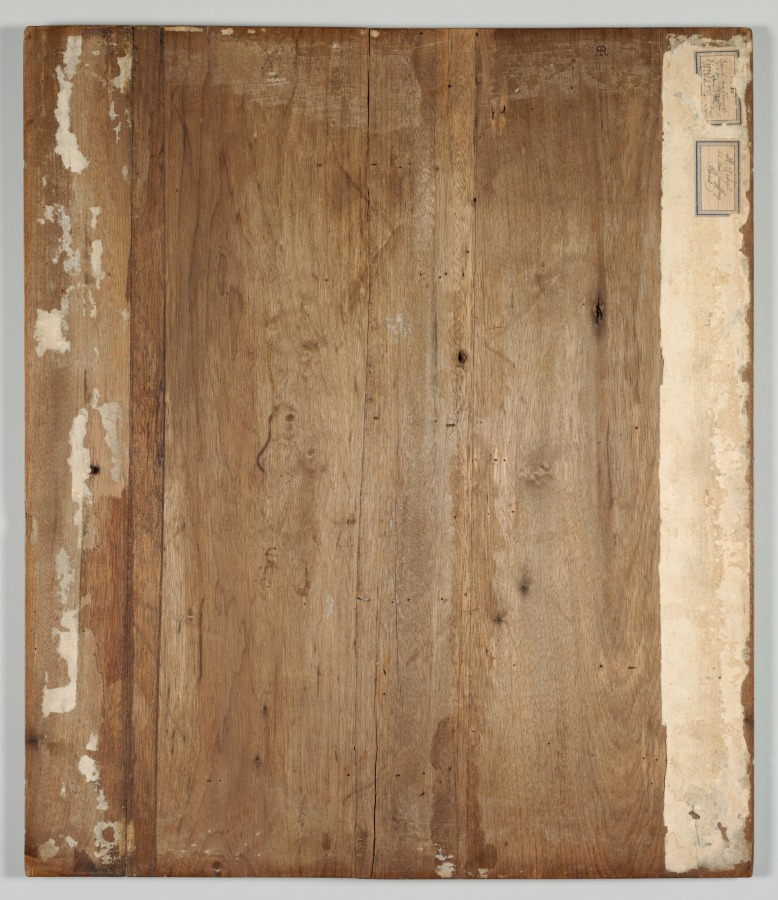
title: Battle Scenes of the Quelling of Rebellions in the Western Regions, with Imperial Poems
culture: China, Qing dynasty (1644–1911), Qianlong reign (1736–95)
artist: Giuseppe Castiglione (Italian, 1688–1766)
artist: Jean Damascene Sallusti (Italian, d. 1781)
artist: Jean Denis Attiret (French, 1702–1768)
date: c. 1765–74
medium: Etchings, mounted in album form, 16 leaves plus two additional leaves of inscriptions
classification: Print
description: This set of etchings was commissioned by Emperor Qianlong to record in pictorial terms the courage of his generals and soldiers in quelling the rebellions in the Western Regions. Qianlong added his own poem to each of the etchings, indicating his appreciation and pride in this demonstration of military might. "Western Regions" refers to the present-day Xingjiang province, often described in Western writing as "Central Asia."